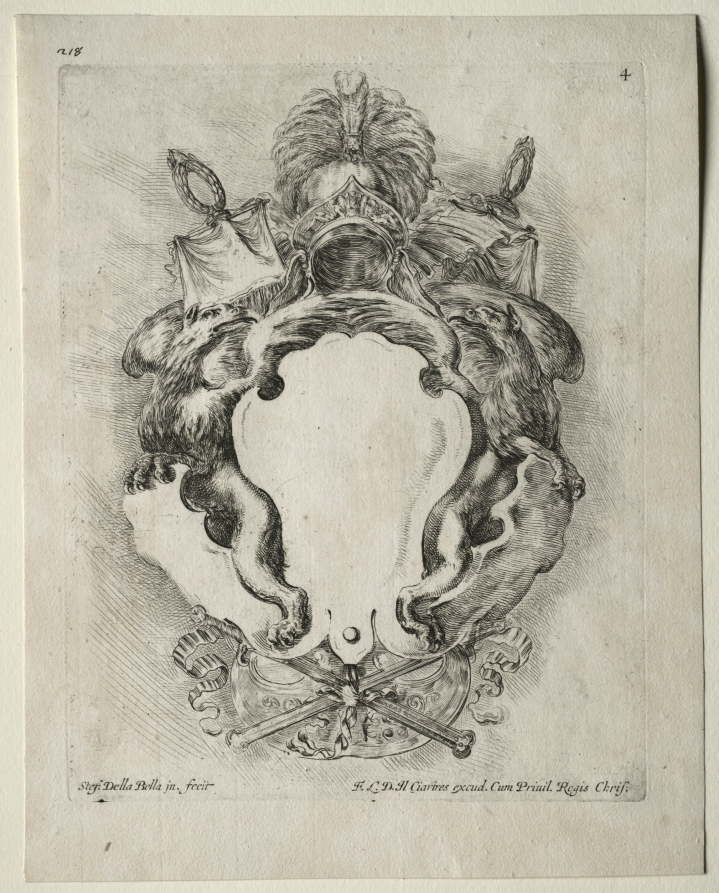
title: Collection of Various Caprices and New Designs of Cartouches and Ornaments: No. 4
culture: Italy, 17th century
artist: Stefano Della Bella (Italian, 1610–1664)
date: 1646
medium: etching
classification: Print